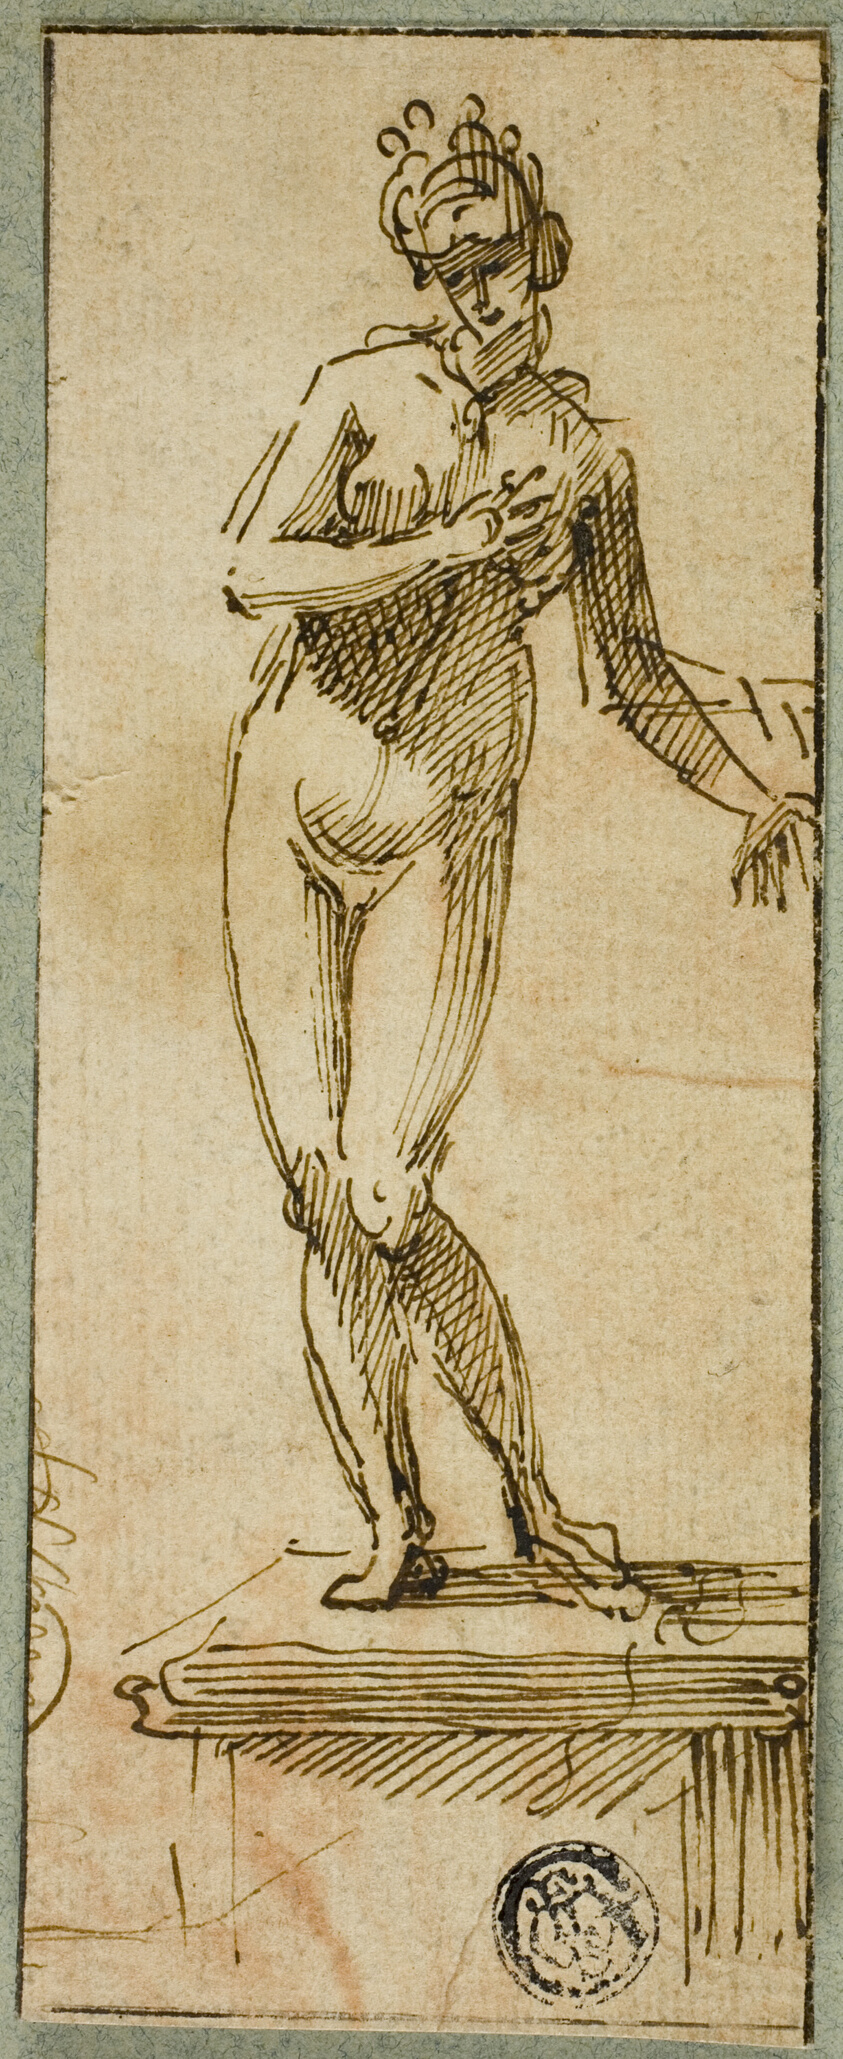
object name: Drawing and Watercolor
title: Venus on Pedestal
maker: Style of Francesco Allegrini; Italian, c. 1615 - after 1679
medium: Pen and brown ink, on buff laid paper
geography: Italy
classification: pen and ink drawings; drawings (visual works); prints and drawing